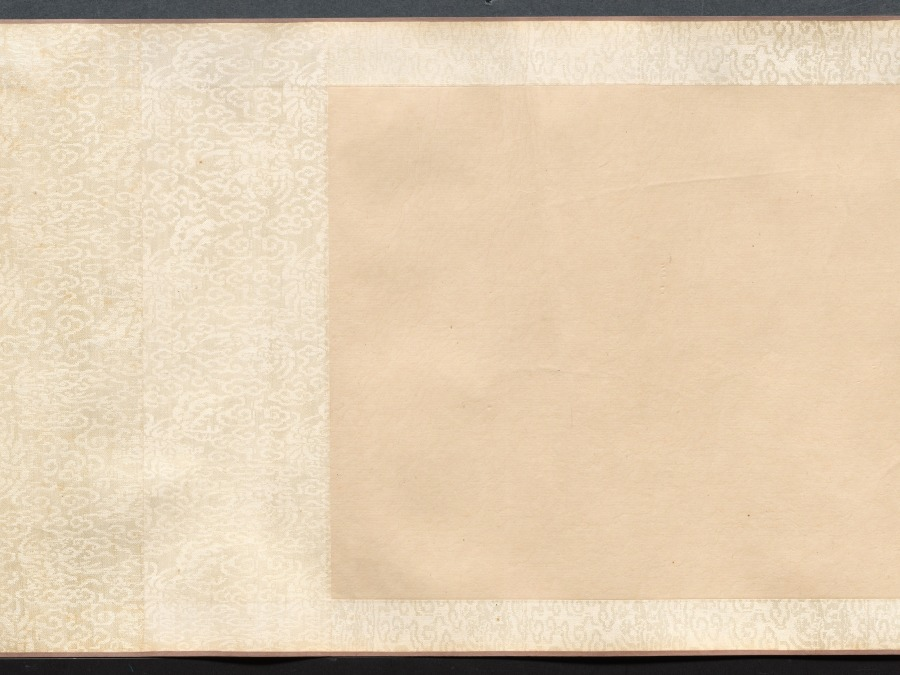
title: Four Poems: Calligraphy in Cursive Script (xingshu)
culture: China, Ming dynasty (1368–1644)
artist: Chen Jiru (Chinese, 1558–1639)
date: 1500s-1600s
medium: handscroll; ink on gold speckled paper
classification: Calligraphy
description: Written in graceful calligraphy with well-composed characters, the artist communicates his thoughts and state of mind in four poems. Characters written in dark, thick strokes convey rhythm, and indicate the moment after the writer had paused to recharge his brush with ink. Chen Jiru was a native of Huating (modern Shanghai). His calligraphy style resembles that of his friend, influential calligrapher Dong Qichang (1555–1636). Unlike Dong, Chen did not pursue government service: he burned his Confucian robes, declined a summons to serve at court, and immersed himself in literature, calligraphy, and painting.